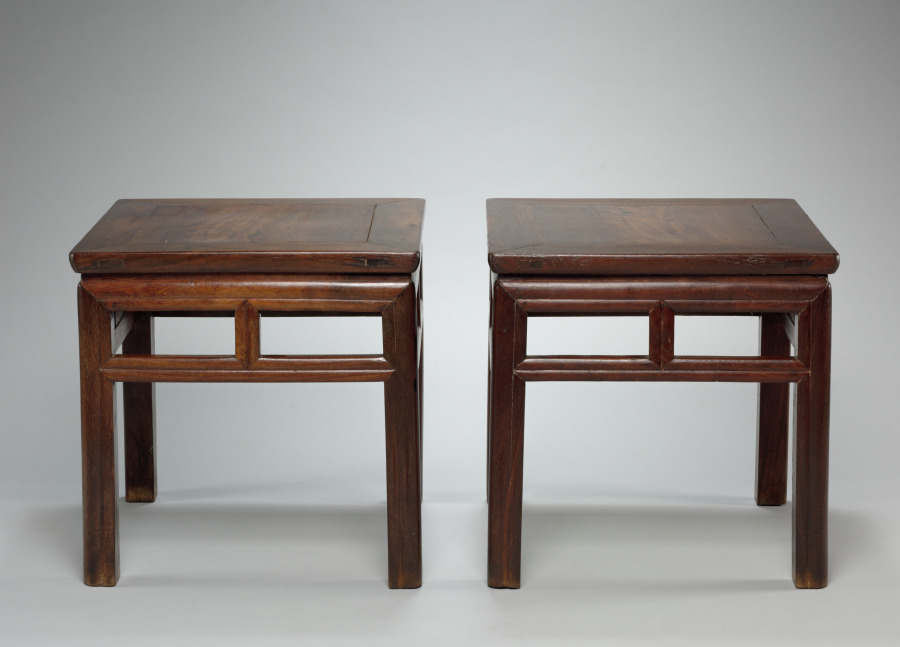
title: Pair of Stools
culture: China, Qing dynasty (1644-1911)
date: 1700–1725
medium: Chicken-wing wood (jichimu)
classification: Furniture and woodwork